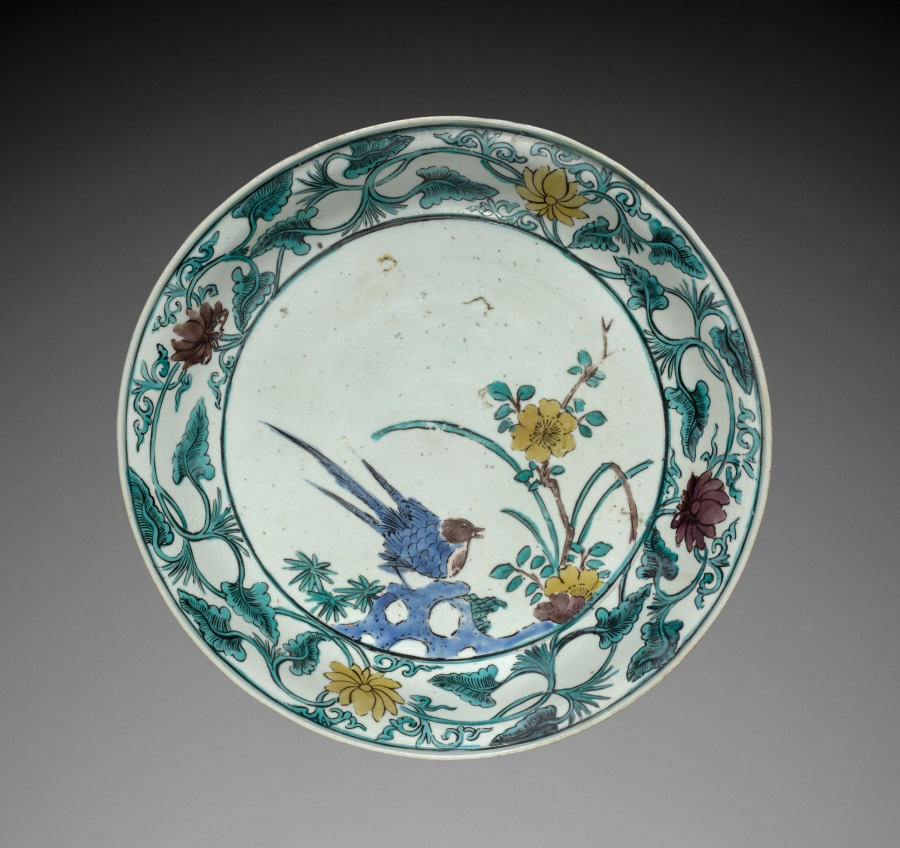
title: Plate with Bird and Flower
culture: Japan, Edo period (1615–1868)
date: mid- to late 1600s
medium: Porcelain with overglaze enamel (Hizen ware, Ko-Kutani style)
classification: Ceramic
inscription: "FUKU" in square seal under aubergine glaze.